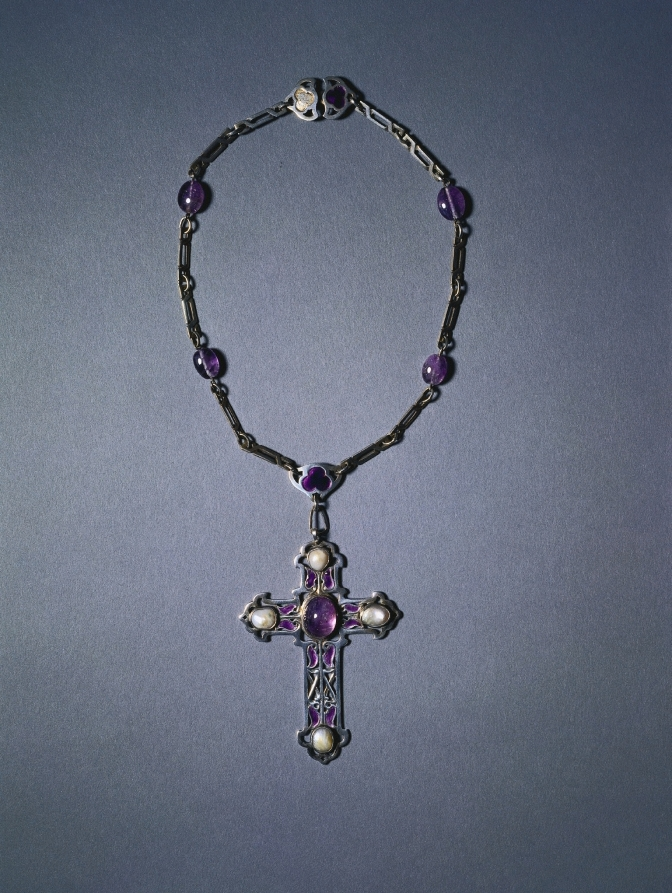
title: Cross Pendant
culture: America, Ohio, Cleveland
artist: Frances Barnum (American)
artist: Jane Carson (American, 1879–1942)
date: c. 1905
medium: silver, enamel, amethyst, pearls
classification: Jewelry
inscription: On back of clasp: CB (the letter B enclosed by the letter C); STERLING incuse